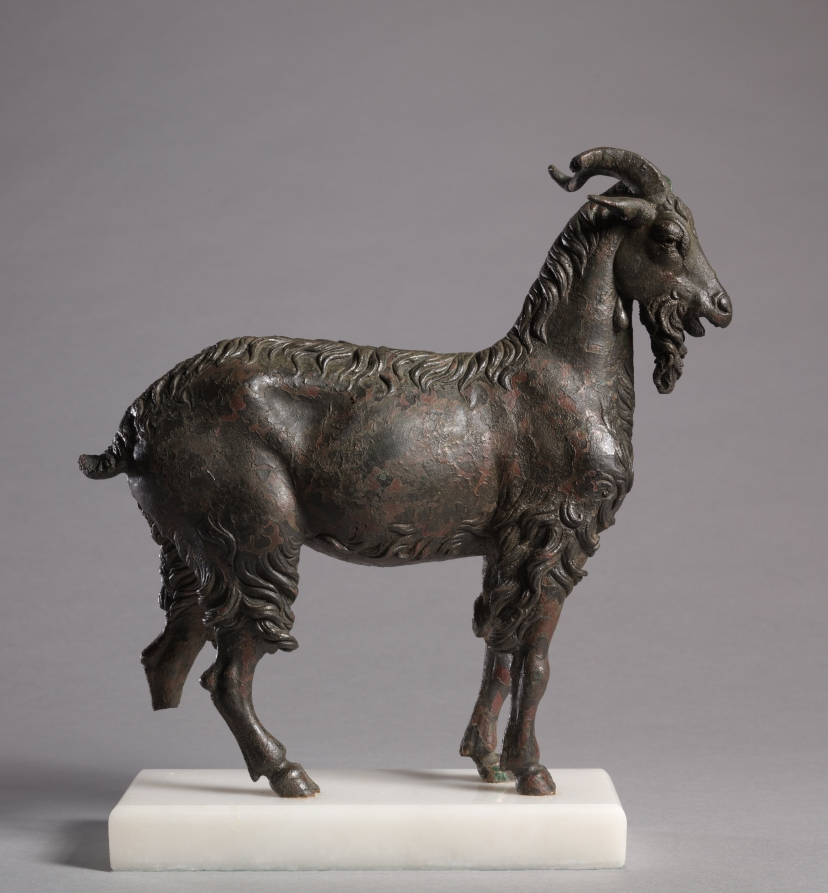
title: Nanny Goat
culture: Greece, Hellenistic period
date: late 200s BCE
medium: bronze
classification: Sculpture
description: Goats were among the earliest domesticated animals and figured prominently in Greek art and mythology since at least the 8th century BC. This example with its powerful stance, curly beard, and horns is not a ram but an expecting doe with swollen flanks. The subject is rare and its meaning unclear. Possibly she was part of a group dedication to a goddess. The sunken areas at the tail and hips and her open mouth, indicating heavy breathing, are signs that she is ready to give birth.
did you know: This sculpture depicts a pregnant goat, which is extremely rare.